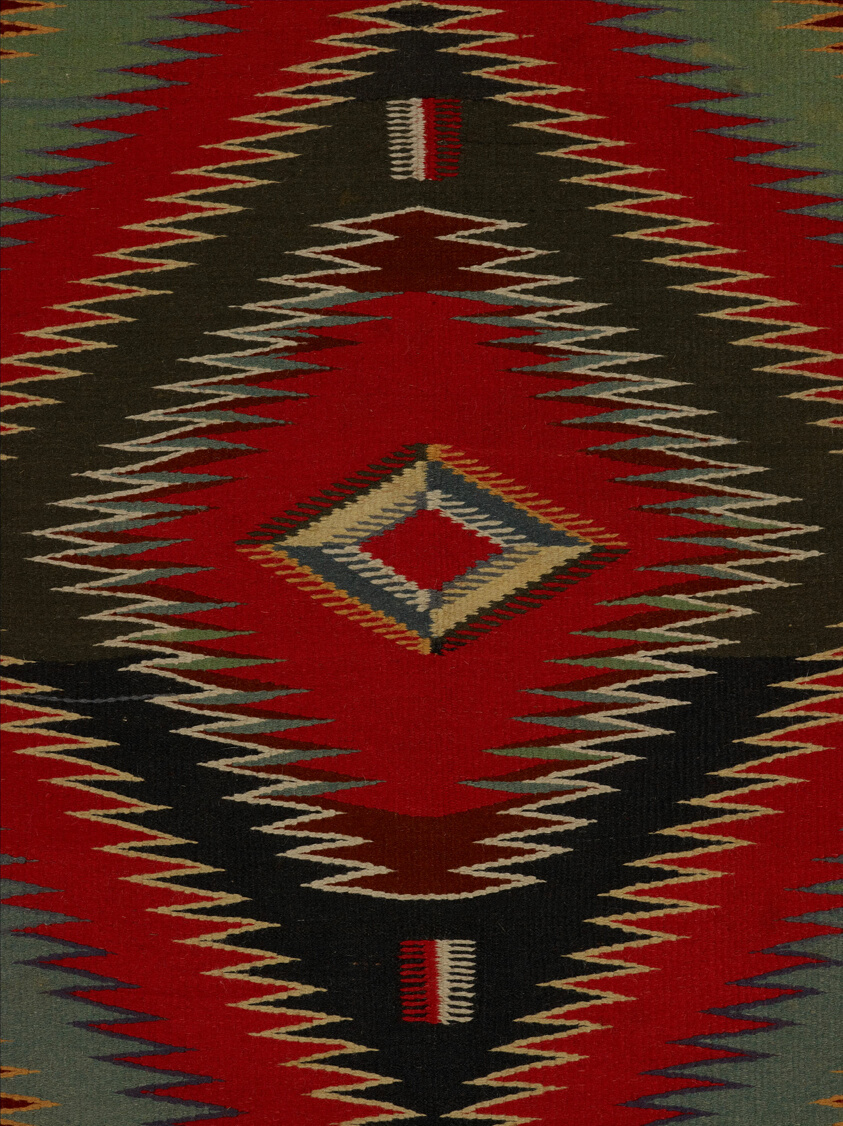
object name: Textile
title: "Eye-Dazzler" Weaving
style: navajo, native american, americas, Folk Art, 19th century, indigenous, north american, native north american, eye-dazzler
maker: Navajo (Diné) (Arizona, New Mexico, and Utah, United States)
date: 1880/1900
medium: Cotton and wool, single interlocking tapestry weave; twined selvages and heading, overcast finish terminating in tassels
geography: Navajo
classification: textile; weaving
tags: geometric, zigzags